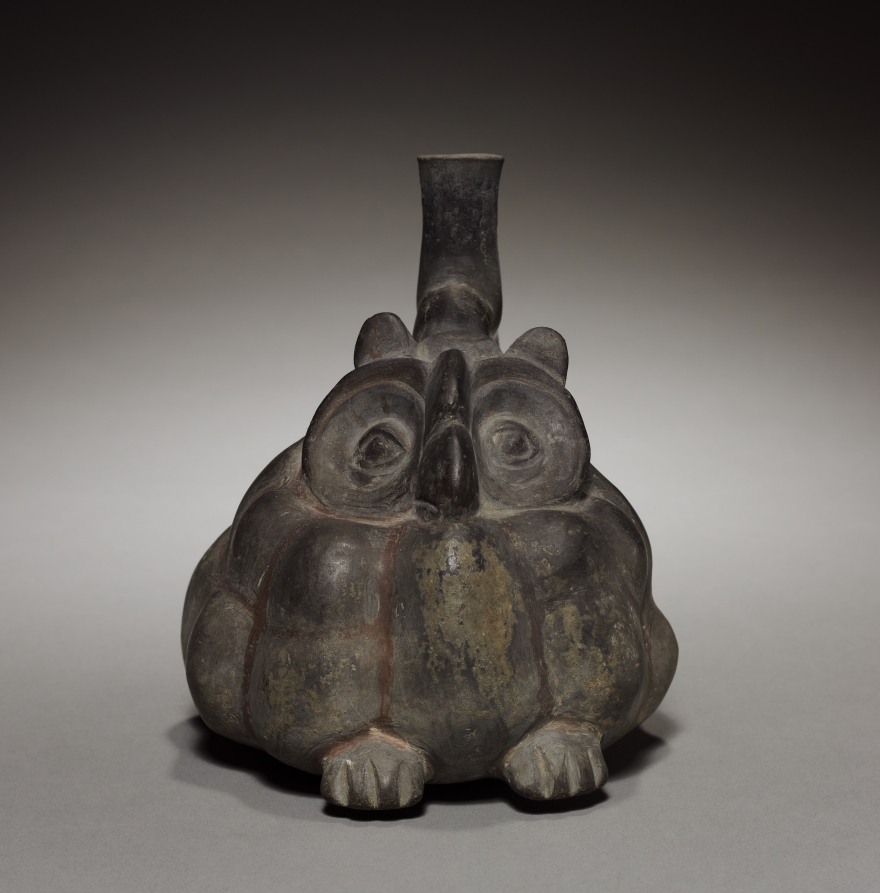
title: Bottle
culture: Peru, Chimú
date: 900–1470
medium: black ware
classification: Ceramic